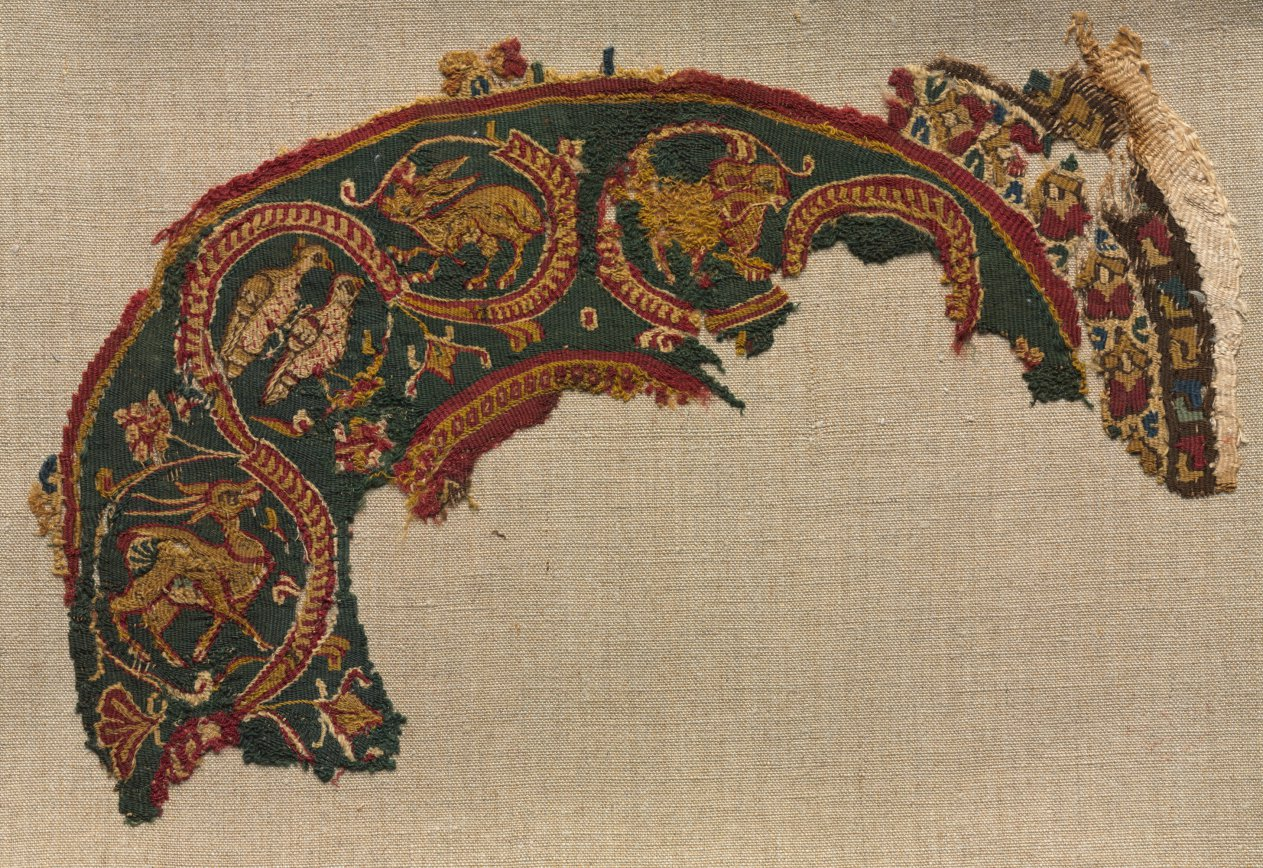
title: Fragmentary Segmentum from a Tunic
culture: Egypt, Umayyad period (661–750) or Abbasid period (750–1258)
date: 700s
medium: Wool and linen: tapestry weave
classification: Textile